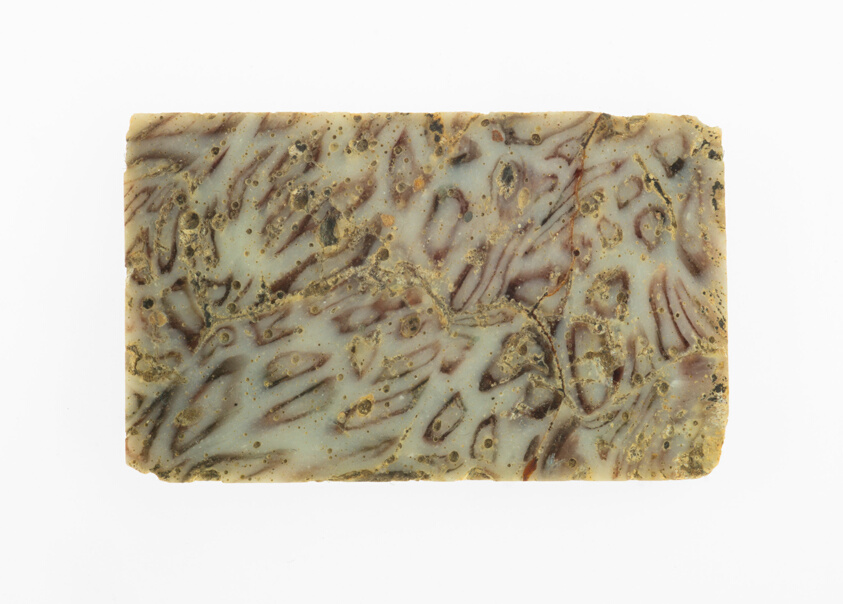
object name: Decorative Arts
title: Fragment of a Wall Revetment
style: roman (ancient, style or period), ancient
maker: Roman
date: 1st century BCE–1st century CE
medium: Glass, mosaic glass technique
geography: Roman Empire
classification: architectural fragment; fragment; decorative arts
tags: decoration